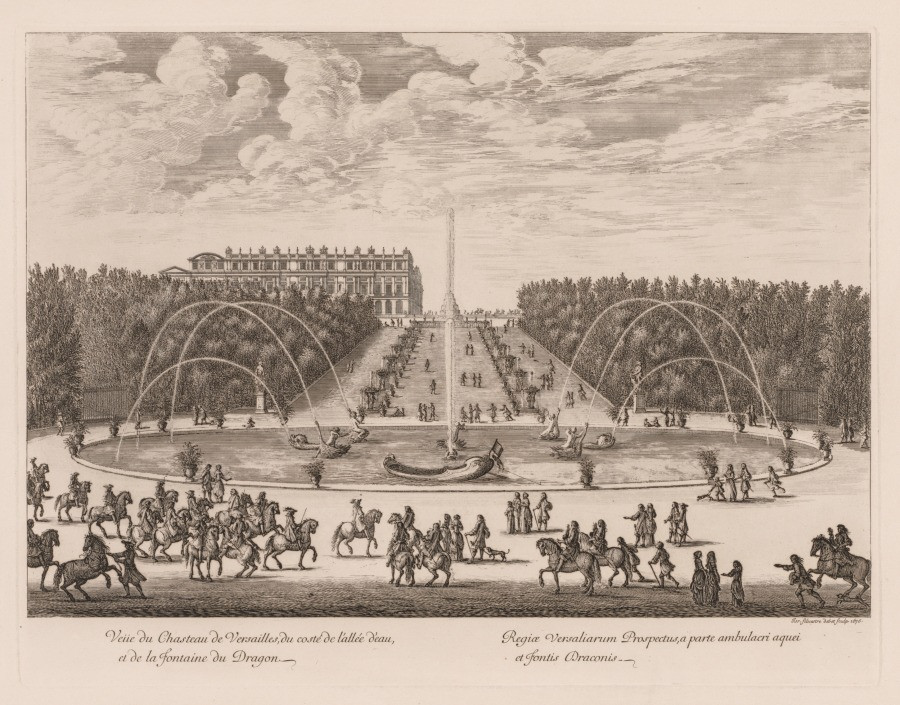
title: Vue du Château de Versailles, du côté de l'allée et de la fontaine du Dragon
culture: France, 17th century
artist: Israël Silvestre (French, 1621–1691)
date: 1676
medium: engraving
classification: Print